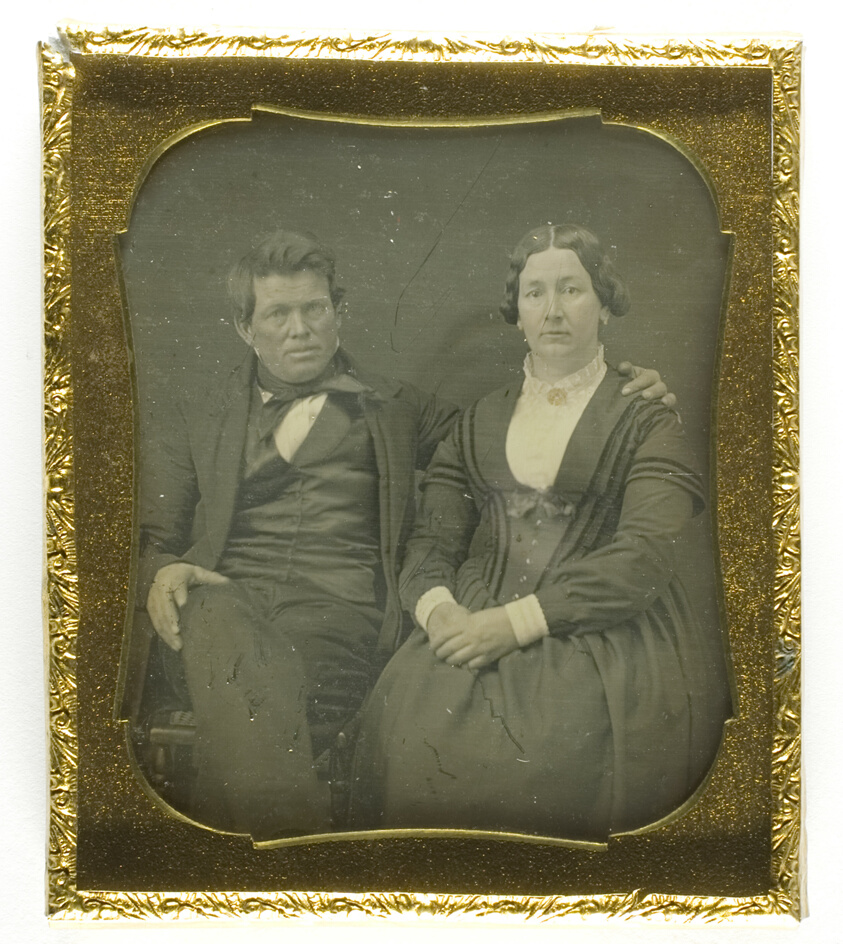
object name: Photograph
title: Untitled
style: 19th century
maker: Artist unknown; 19th century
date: 1839/60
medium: Daguerreotype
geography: Unknown Place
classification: daguerreotype; photographic process; photography; photograph